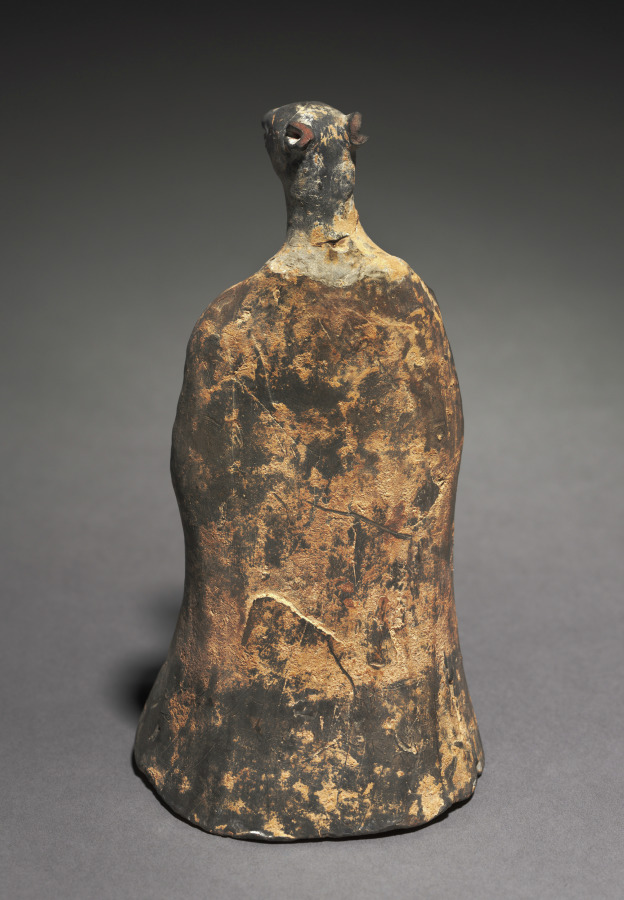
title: Mortuary Figure of the Zodiac Sign: Hare (Cancer)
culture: China, Northern Wei dynasty (386-534)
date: 500s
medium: gray earthenware with traces of slip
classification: Sculpture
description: The twelve-animal zodiac series—rat, ox, tiger, rabbit, dragon, snake, horse, goat, monkey, rooster, dog, and boar—signifies a traditional Chinese concept of time structured in a cyclical order. The twelve animals are also linked to the art of fortune-telling that underlies human existence in connection with the changes of the universe. The use of the twelve zodiac animals as tomb furniture suggests they provided a cosmological structure for the afterlife.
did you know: At some point in the past, both right and left ears were broken off close to the figure's head.